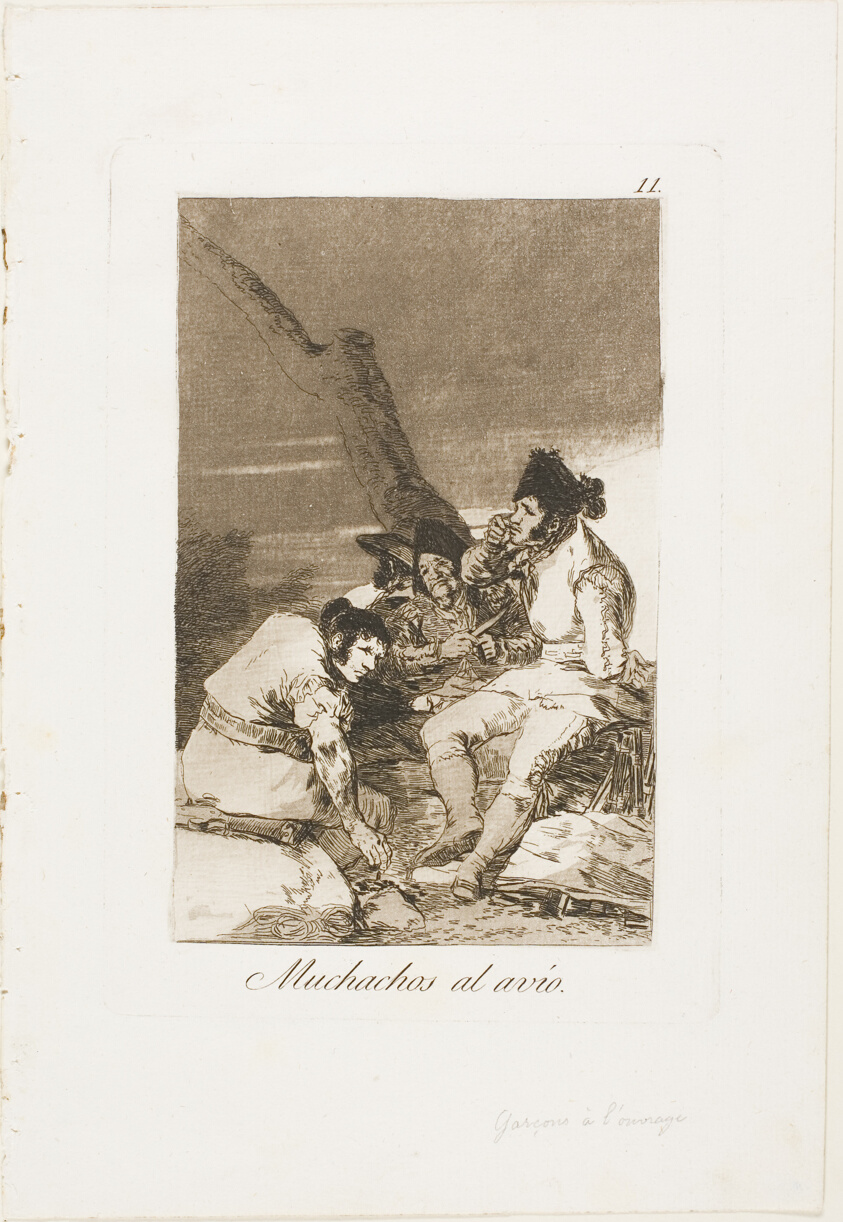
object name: Print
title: Lads Making Ready, plate eleven from Los Caprichos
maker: Francisco José de Goya y Lucientes (Spanish, 1746-1828)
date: 1797/99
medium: Etching and aquatint on ivory laid paper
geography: Spain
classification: etching; print; prints and drawing